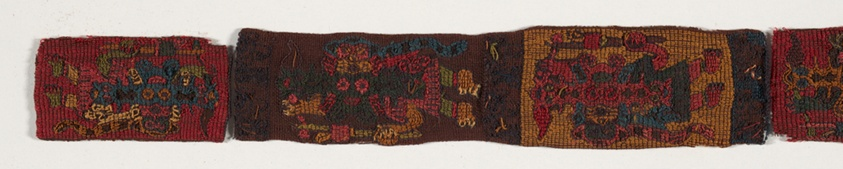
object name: Textile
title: Fragments (Border)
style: nazca, paracas, andean, andes, Pre-Columbian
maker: Nazca; Peru, south coast, Nazca Valley, Coyungo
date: 100 B.C./A.D. 200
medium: Cotton, plain weave; embroidered with camelid wool and cotton in stem and running stitches.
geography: Peru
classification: textile; needlework (visual works)